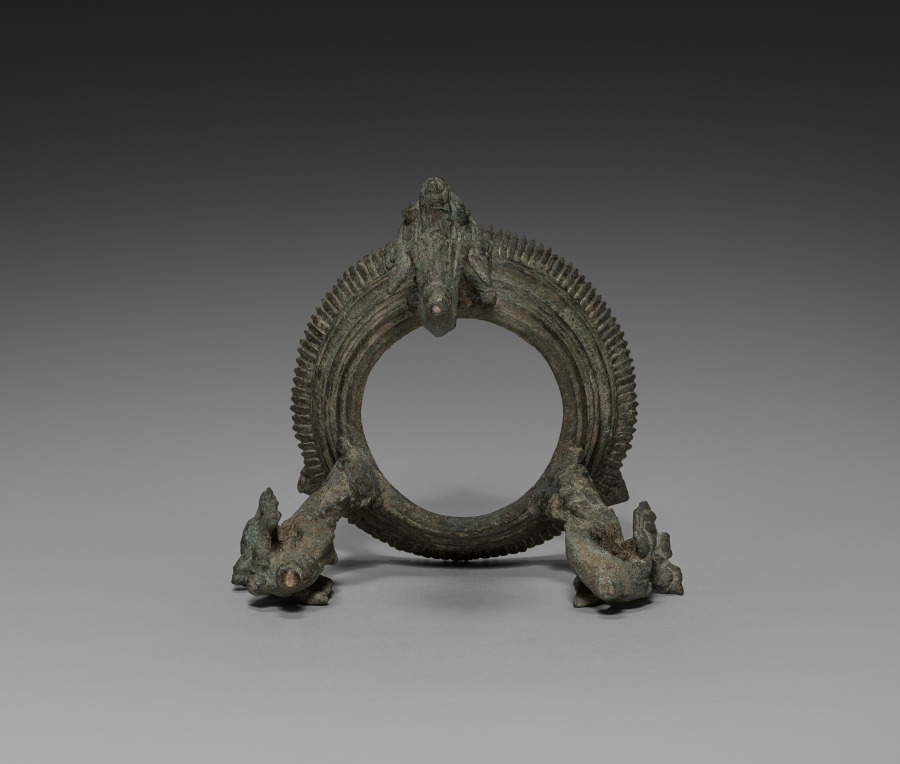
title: Tripod stand with nagas for a ritual conch shell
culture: Cambodia, Khmer, Angkor Period, 12th-13th Century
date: 1100s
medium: shell and bronze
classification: Sculpture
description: A royal temple like Banteay Chhmar was built for performing rituals and to honor images of gods, Buddhas, and other sacred or enlightened beings for the sake of the kingdom’s protection and ongoing prosperity. Conch shells were blown at the start of rituals to make the sound corresponding to the syllable om. The dancing figure of Hevajra, a Buddhist being of enlightenment with eight heads, sixteen arms, and four legs, has been worked into the bronze embellishment of the shell. Hevajra was elevated to a prominent position in Khmer Buddhism of the Angkorian period as the standard figure denoting the practice of rituals prescribed in a text called the Hevajra-tantra. The tripod stand with three serpents is probably not original to the shell.